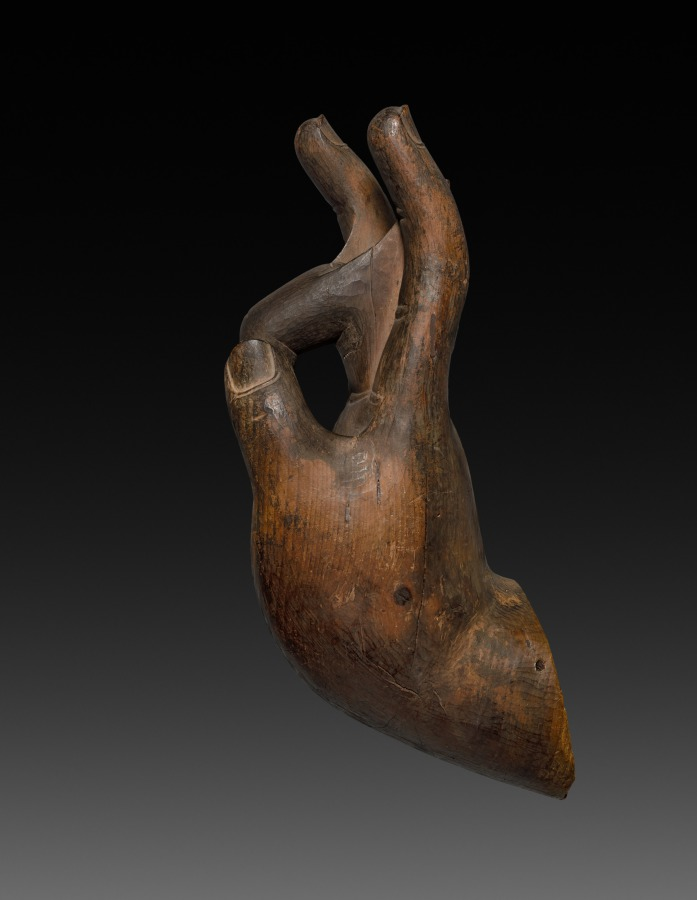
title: Hand of Buddha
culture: Japan, Nara period (710–94)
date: late 700s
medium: wood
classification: Sculpture